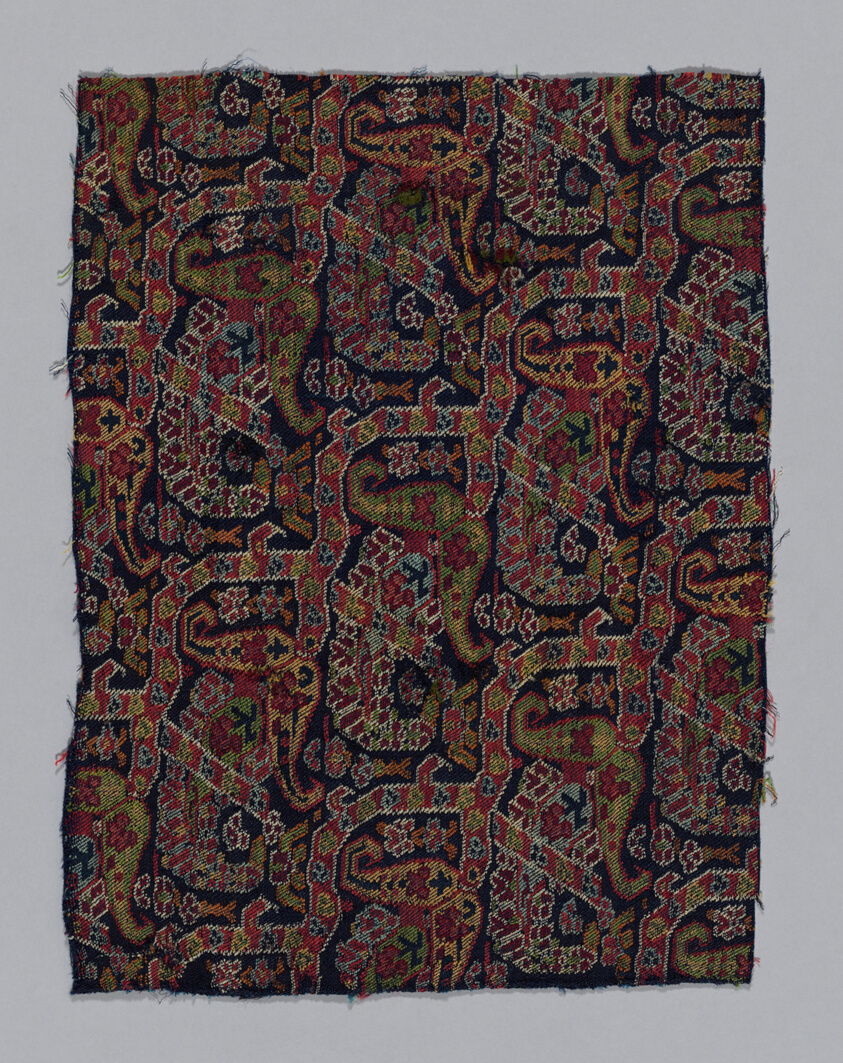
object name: Textile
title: Fragment (From a shawl)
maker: Iran (Persia)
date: 1850/99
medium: Wool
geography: Iran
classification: textile; weaving